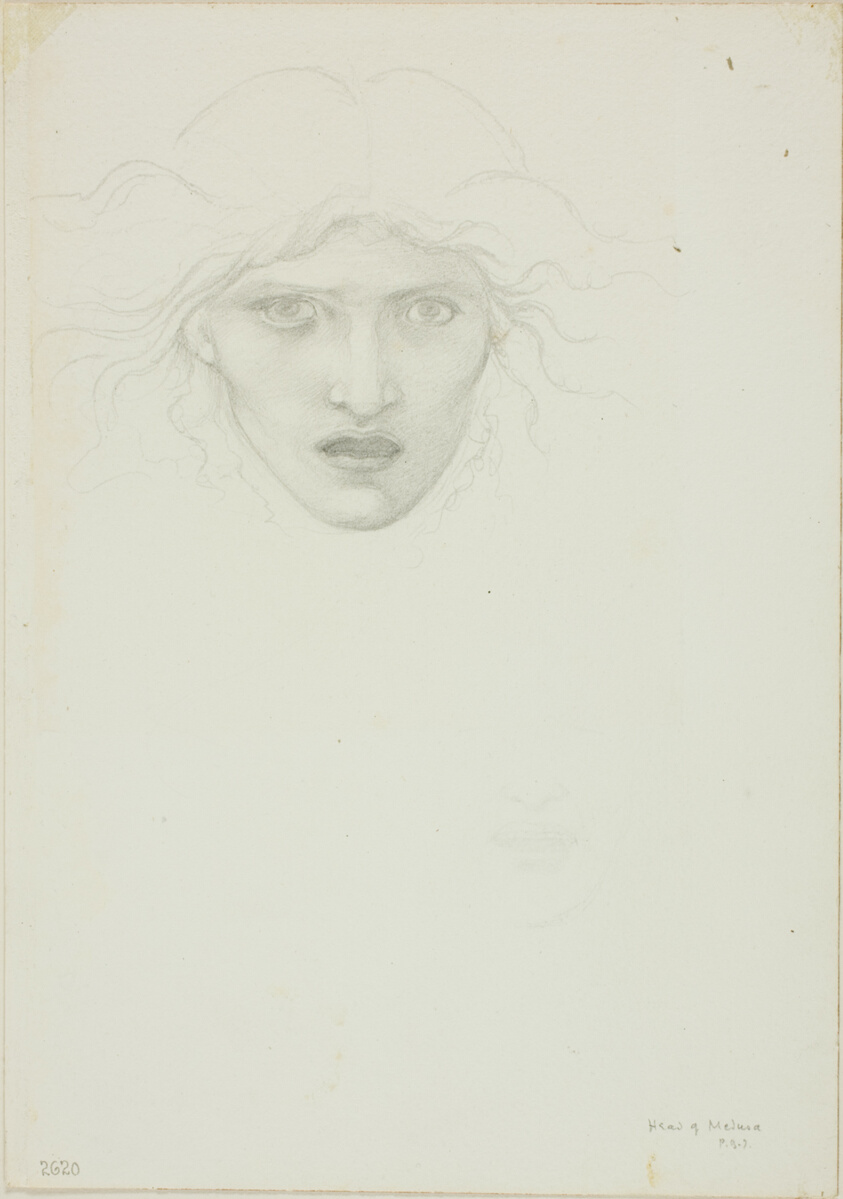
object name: Drawing and Watercolor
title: Study for Rondanini Medusa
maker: Sir Edward Burne-Jones (English, 1833-1898)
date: c. 1873–77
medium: Graphite on ivory wove paper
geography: England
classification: graphite; drawings (visual works); prints and drawing